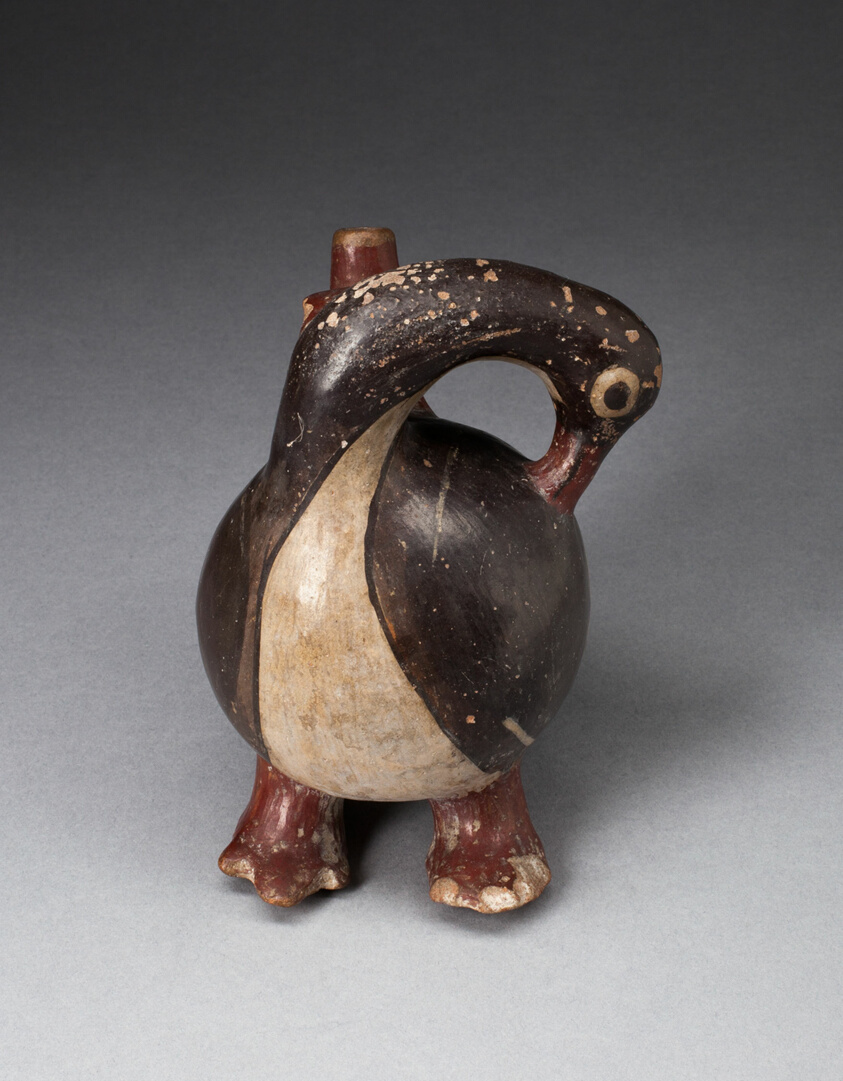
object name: Vessel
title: Vessel in the Form of a Long-Necked Bird, Possibly a Goose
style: nazca, early intermediate period, Pre-Columbian, americas, Arts of the Americas, andean, andes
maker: Nazca; South coast, Peru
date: 180 BCE–500 CE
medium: Ceramic and pigment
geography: Peru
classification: earthenware; art of the americas; ceramics; vessel